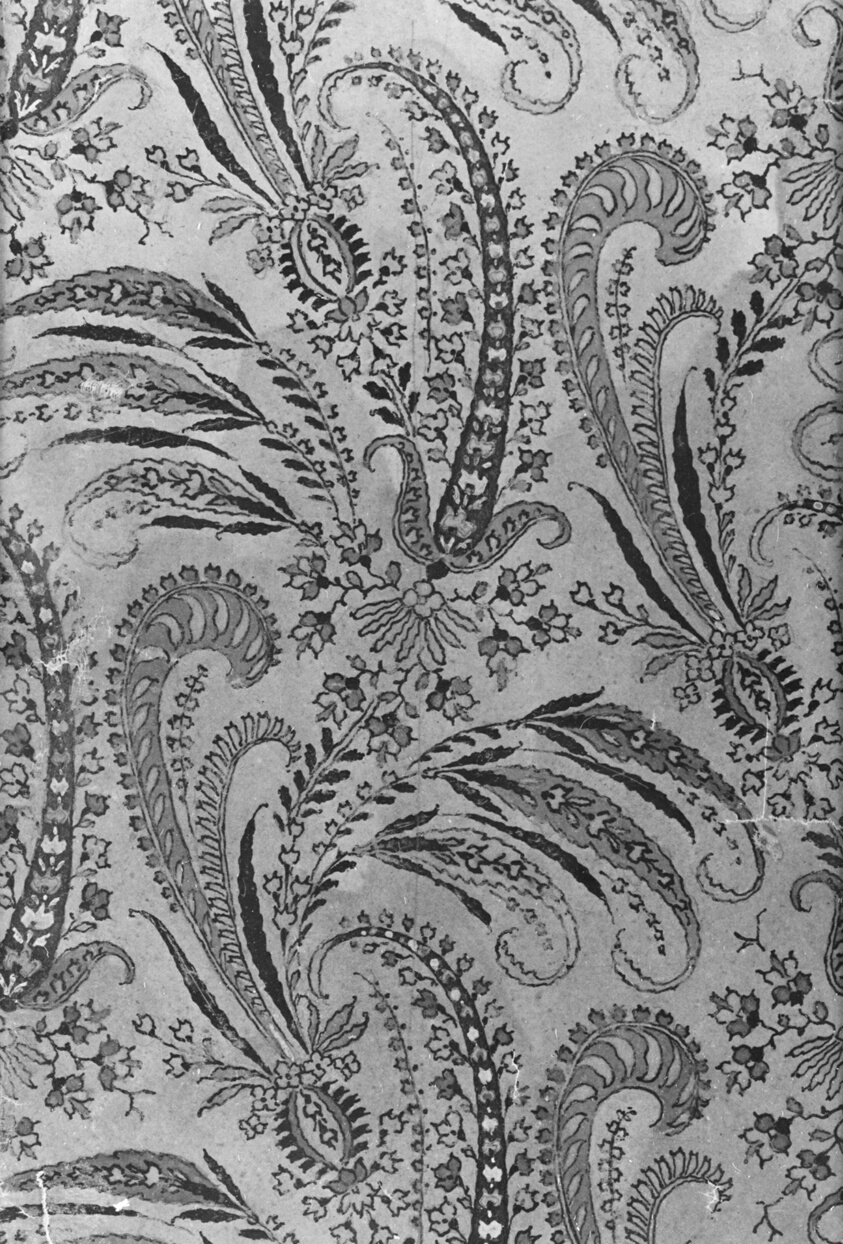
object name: Book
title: Book of 81 Painted Designs for Woven Textiles (Volume I)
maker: France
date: 1815/40s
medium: Paper, gouache, varnish or oil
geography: France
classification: textile; book